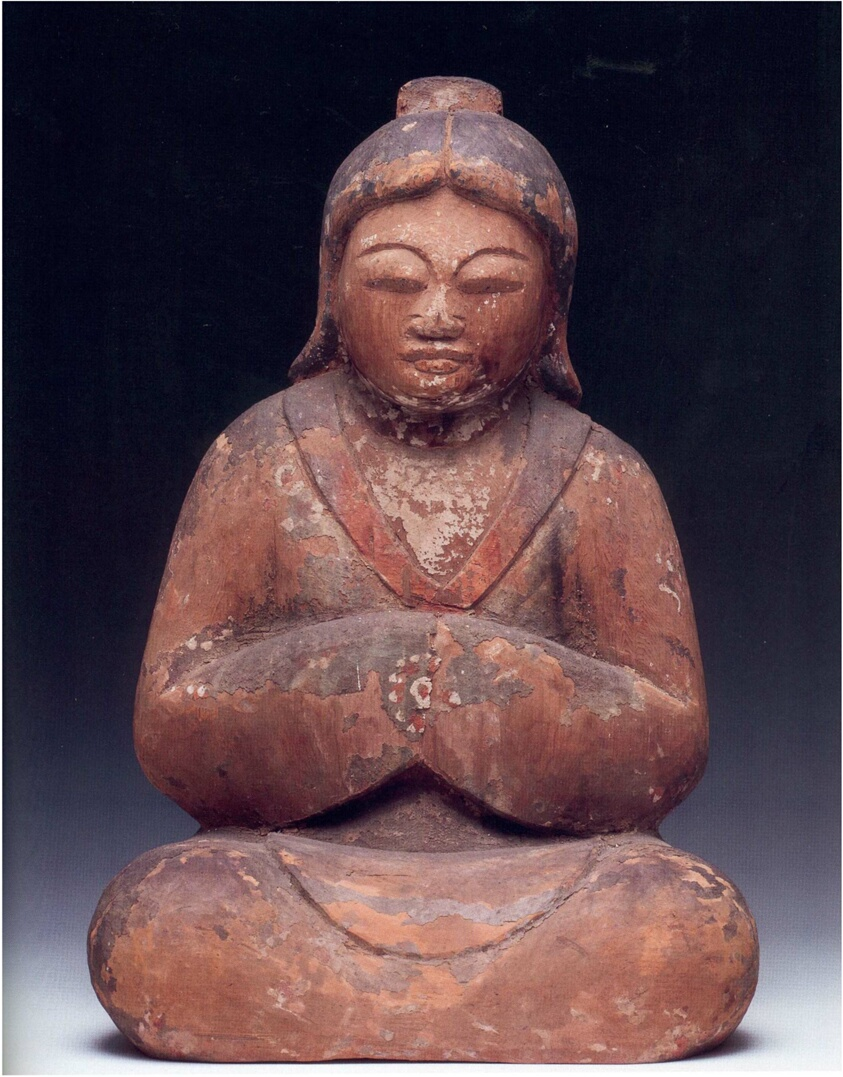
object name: Sculpture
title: Female Shinto Deity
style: Japanese (culture or style)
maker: Japan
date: 12th century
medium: Wood with traces of polychromy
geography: Japan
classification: wood; sculpture